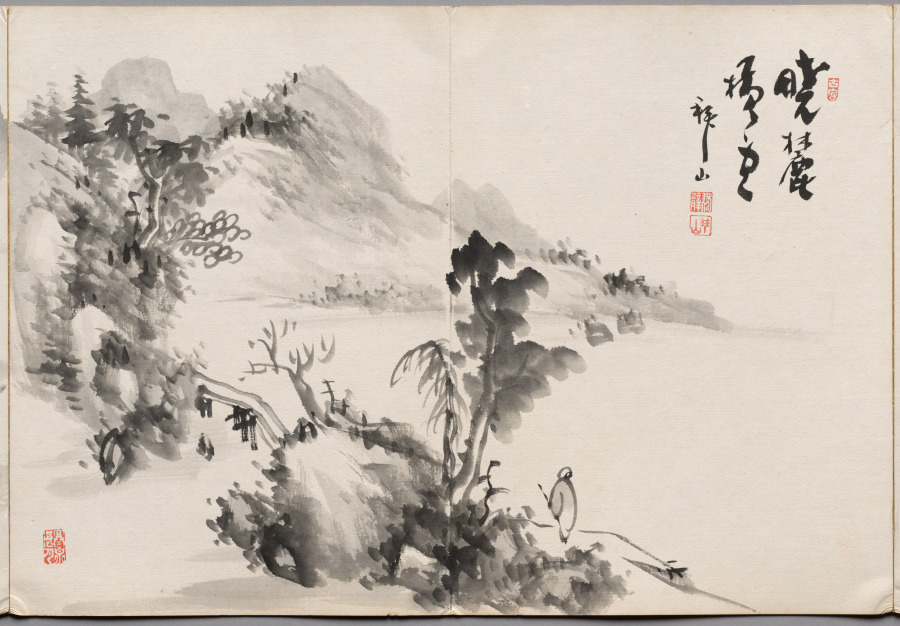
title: Painting Three from Album of Paintings by Haizan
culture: Japan, Meiji period (1868–1912) or Taishō period (1912–26)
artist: Yoshitsugu Haizan (Japanese, 1846–1915)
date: late 1800s-early 1900s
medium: page spread from double-sided accordion album; ink and color on paper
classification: Painting